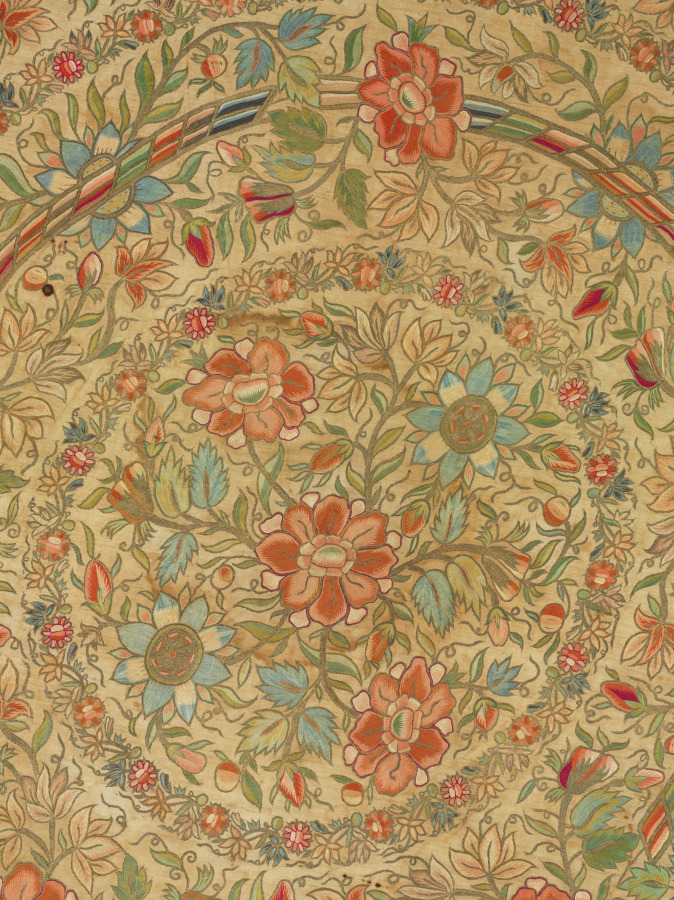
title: Embroidered tray cover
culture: Turkey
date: 1800s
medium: plain weave: linen; embroidery, chain stitch: silk and gilt-metal thread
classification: Embroidery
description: Elaborately embellished round embroideries often covered the metal trays that accompanied traditionally gracious Turkish hospitality and cuisine. Here, exuberant floral displays and garlands bearing large blossoms with shaded petals enrich the circular designs that feature extravagant gilt-metal thread and many lush colors of silk thread. The embroidered stitches almost conceal the linen ground in a spectacular tour-de-force.